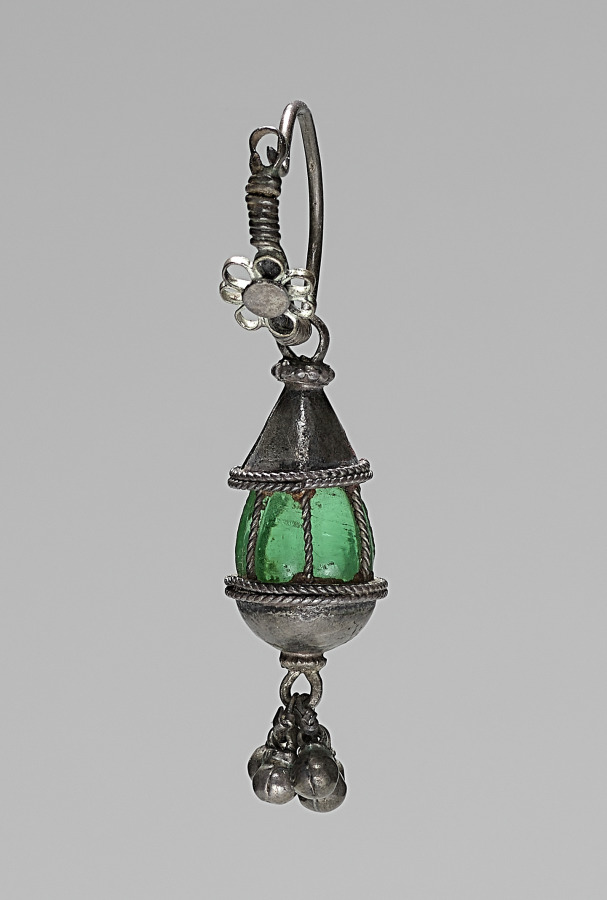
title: Earring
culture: India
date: 1800s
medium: silver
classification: Jewelry